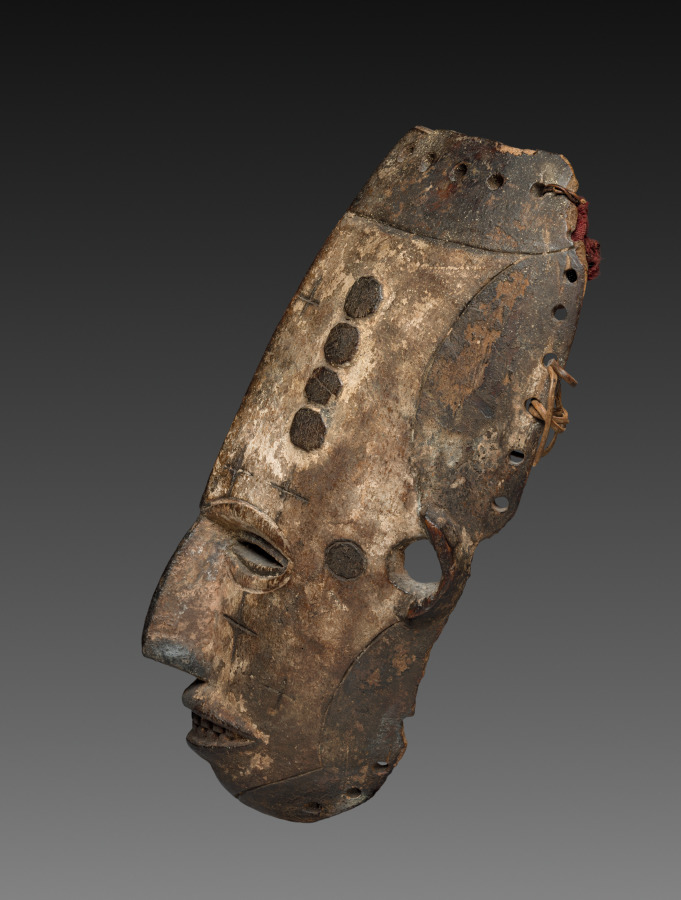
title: Face Mask (Agboho mmuo)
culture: Africa, West Africa, Nigeria, Igbo-style maker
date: possibly early 1900s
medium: Wood, pigment, plant fiber, and cotton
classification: Mask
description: This small face mask would have been complemented by a separate, elaborate superstructure covered with cotton cloth. Though always worn by a man, the image glorifies youthful female beauty. Derived from chalky clay, the white coloration of the face refers to ancestral spirits whose powers the mask evokes. The masks dance in festivals that generally celebrate the dead but also appear at funerals to escort the deceased to the land of the ancestors.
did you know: Though always worn by a man, the imagery of this mask celebrates youthful female beauty.